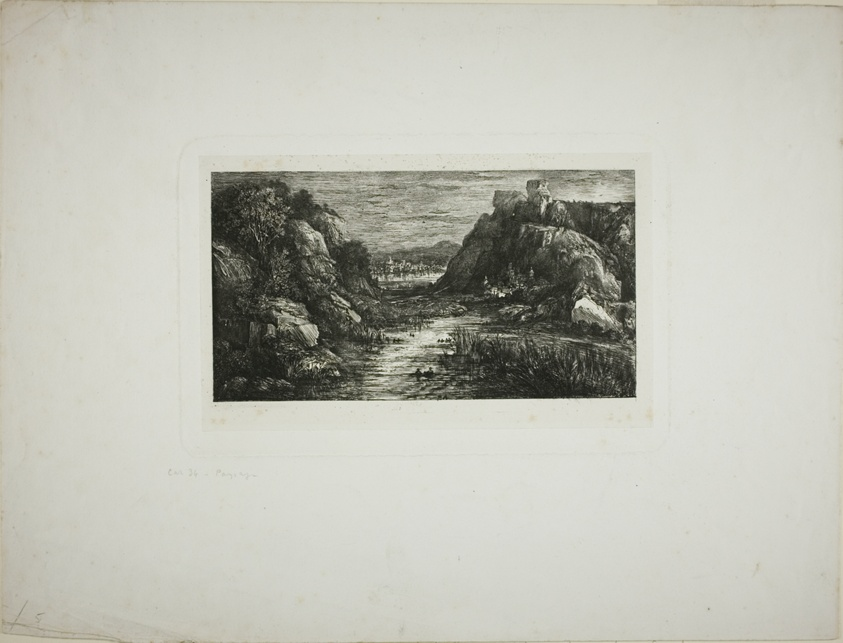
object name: Print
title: The Distant City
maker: Rodolphe Bresdin (French, 1825-1885)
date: 1868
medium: Etching and roulette on ivory China paper laid down on white wove paper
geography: France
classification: etching; print; prints and drawing